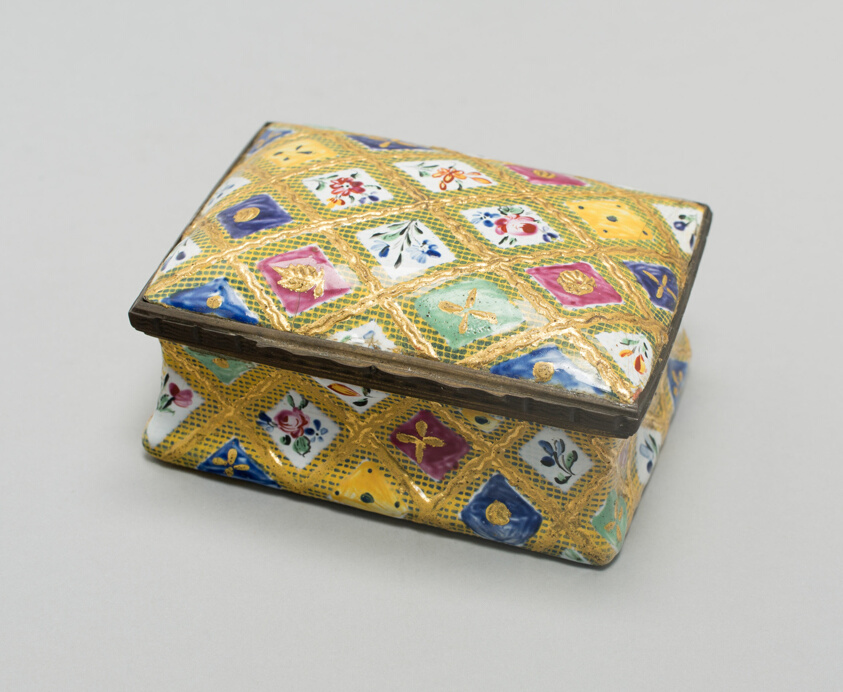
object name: Metalwork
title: Snuff Box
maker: South Staffordshire, England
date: c. 1780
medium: Metal and enamel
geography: South Staffordshire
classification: snuff box; enamel; metalwork